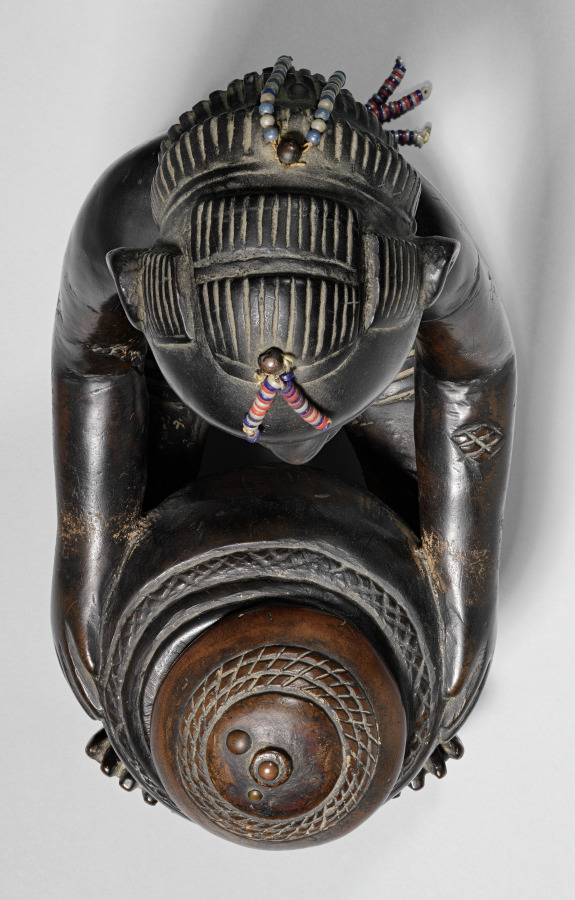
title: Female Bowl-Bearing Figure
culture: Africa, Central Africa, Democratic Republic of Congo, Luba-style carver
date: late 1800s-early 1900s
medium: Wood, glass beads, upholstery studs, plant fiber, and iron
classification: Sculpture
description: In Luba-style art, an object's beauty affects how well it works. While bowl-bearing figures had many possible uses, a royal diviner likely used this well-carved image of a woman carrying a bowl in rituals. Dusty traces of mpemba (white chalk) fleck the shining exterior and the bowl's interior, showing it once held this sacred powder. Diamond-shaped scarification marks at her waist, chest, and back add to her beauty. Her hair is carved into the cascading layered hairstyle worn in the Luba region at the turn of the twentieth century. Strands of imported glass beads encircle her waist and neck, and dangle from her hair. The alternating white and blue beads may symbolize the moon and Mbidi Kiluwe, a culture hero linked to royal practice and smithing. While much Luba-style art depicts women—who are societally important—men created and owned the majority of such works.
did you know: Symbolic of anvils, the round metal tacks decorating the figure's hair "pin" spirits and their secrets within it. They are at the hairline and each of the four hair cascades (the bottommost is now gone).